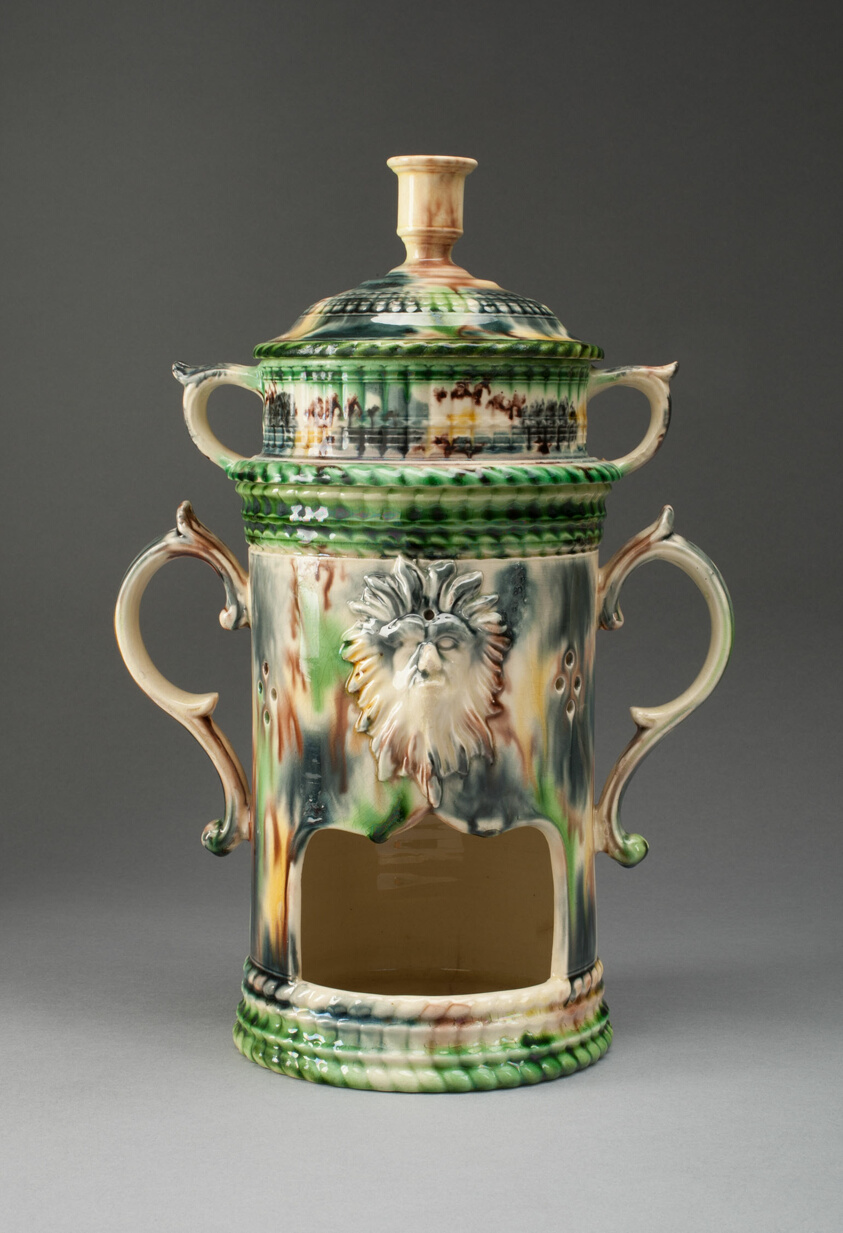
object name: Ceramics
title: Veilleuse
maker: Staffordshire, England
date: 1760–70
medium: Lead-glazed earthenware (creamware)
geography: Staffordshire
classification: earthenware; ceramics; creamware; european decorative arts; lead-glazed earthenware